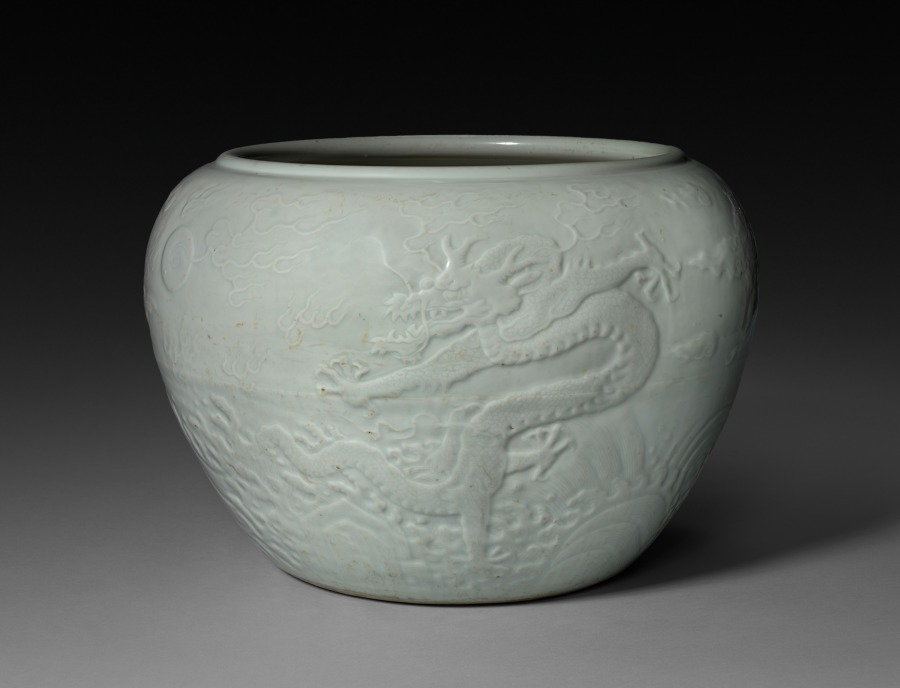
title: Jardiniere with Dragon in Waves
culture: China, Jiangxi province, Jingdezhen kilns, Qing dynasty (1644-1911), Kangxi reign (1662-1722)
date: 1662–1722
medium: porcelain with molded and incised decoration and light celadon glaze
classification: Ceramic